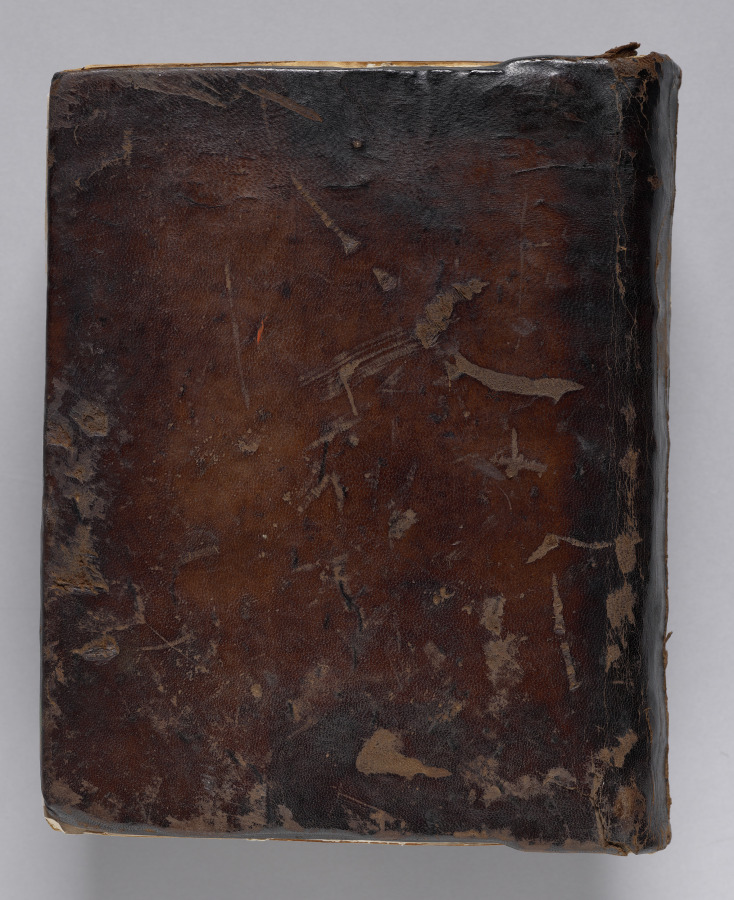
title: Gospel Book with Commentaries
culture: Byzantium, Constantinople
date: c. 1000–1100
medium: ink, tempera, and gold on vellum; leather binding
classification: Bound Volume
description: Each of the four Gospels in this book opens on a page with brilliantly illuminated borders depicting the author of the text as well as birds—principally peacocks, symbols of the immortality of the soul— and fountains, representing the fountain of life and the salvation of the soul. This volume consists of 428 leaves with texts in Greek. Its high level of sophistication is characteristic of monasteries in Constantinople.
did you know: Gospel Books were carried in procession through Byzantine churches.